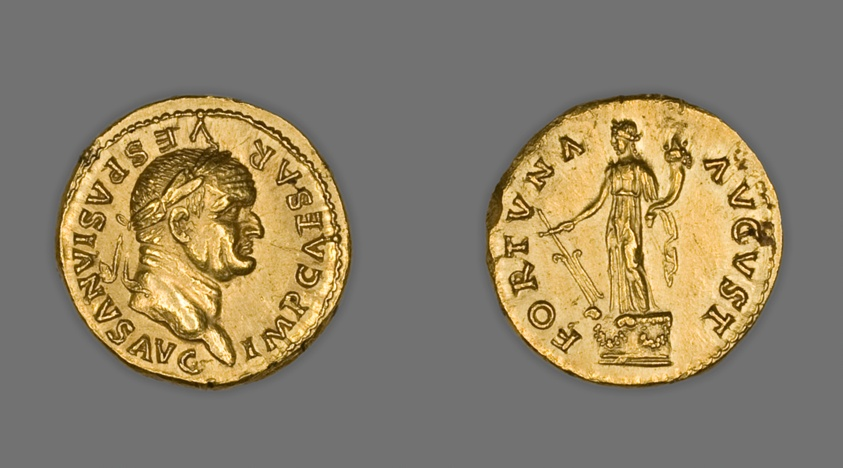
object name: Coin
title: Aureus (Coin) Portraying Emperor Vespasian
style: imperial (roman), ancient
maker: Roman; minted in Rome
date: 75-79, issued by Vespasian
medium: Gold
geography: Rome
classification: coin; ancient art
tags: goddesses, gods (deities)